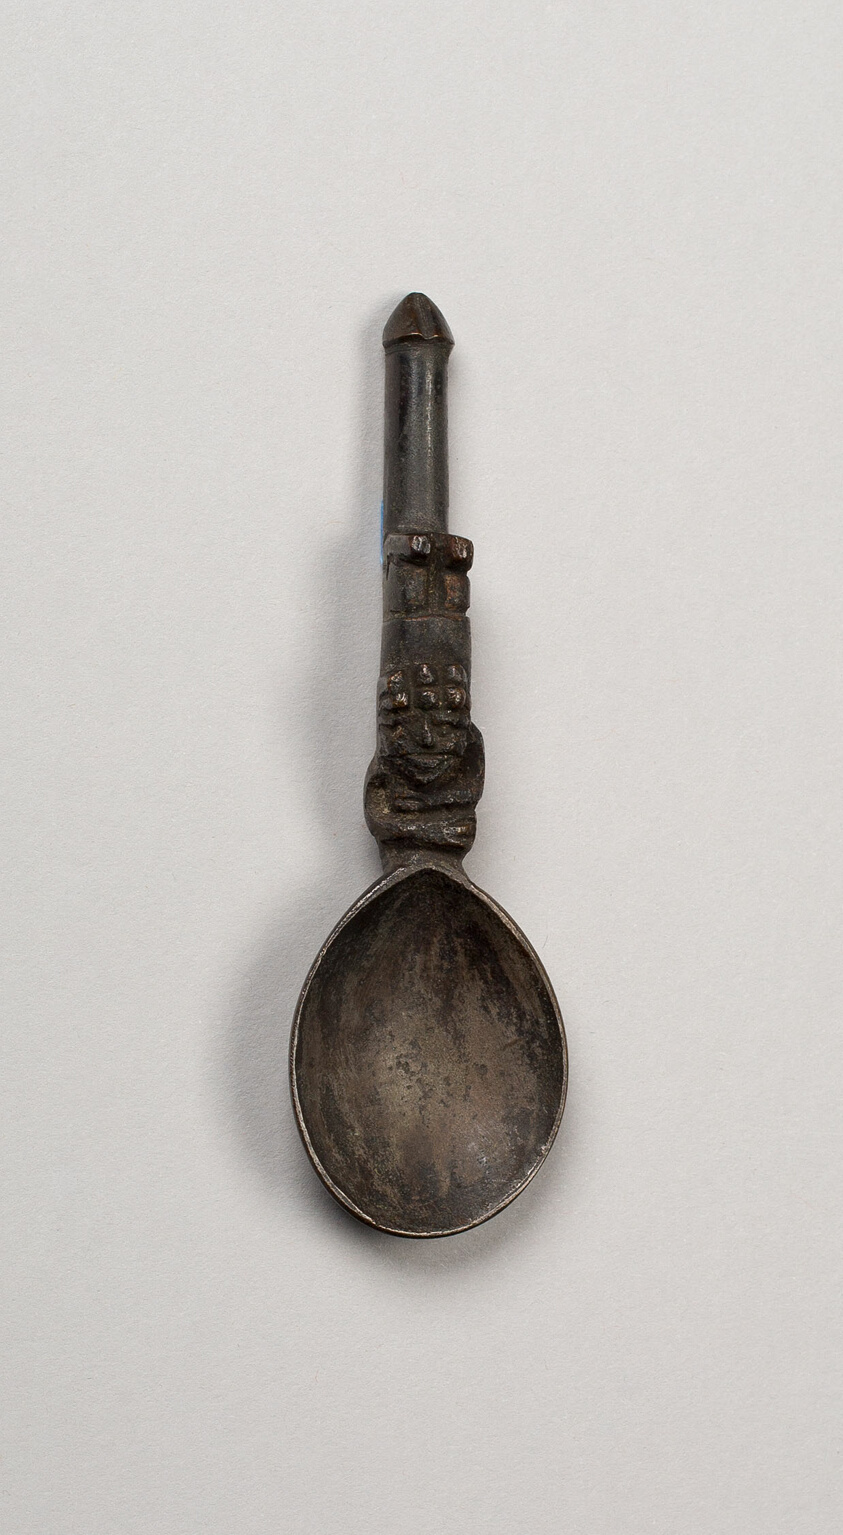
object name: Decorative Arts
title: Spoon with Reclining Figure on Handle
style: inca, Arts of the Americas, andean, andes, south american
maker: Possibly Inca; South coast or southern highlands, Peru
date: 1450–1532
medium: Bronze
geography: Peru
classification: metal; american decorative arts; utensil; decorative arts; art of the americas